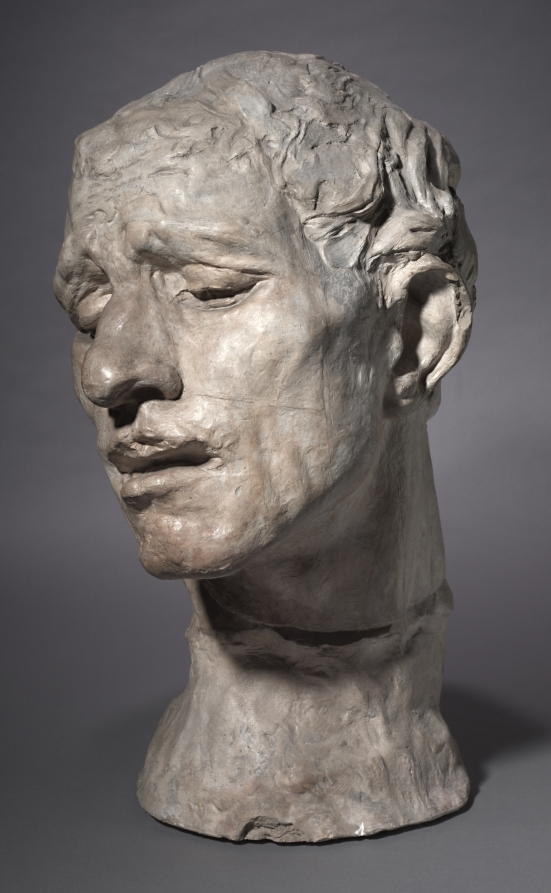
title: Heroic Head of Pierre de Wissant, One of the Burghers of Calais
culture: France, late 19th-early 20th Century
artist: Auguste Rodin (French, 1840–1917)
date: 1886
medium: plaster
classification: Sculpture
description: This sculpture depicts one of the figures in Rodin’s large public monument The Burghers of Calais (1884–89), featuring six French men who volunteered to be taken prisoner by the English in exchange for lifting the siege of Calais during the Hundred Years War (1337–1453). Pierre de Wissant’s anguished expression suggests extreme mental suffering as he contemplates his expected execution. Rodin exhibited a life-size version of the figure as an independent work before completing the monument. He later made multiple versions in various sizes and media. This plaster features a highly expressive, hand-worked surface inscribed in places with graphite and covered with delicate, tinted washes.